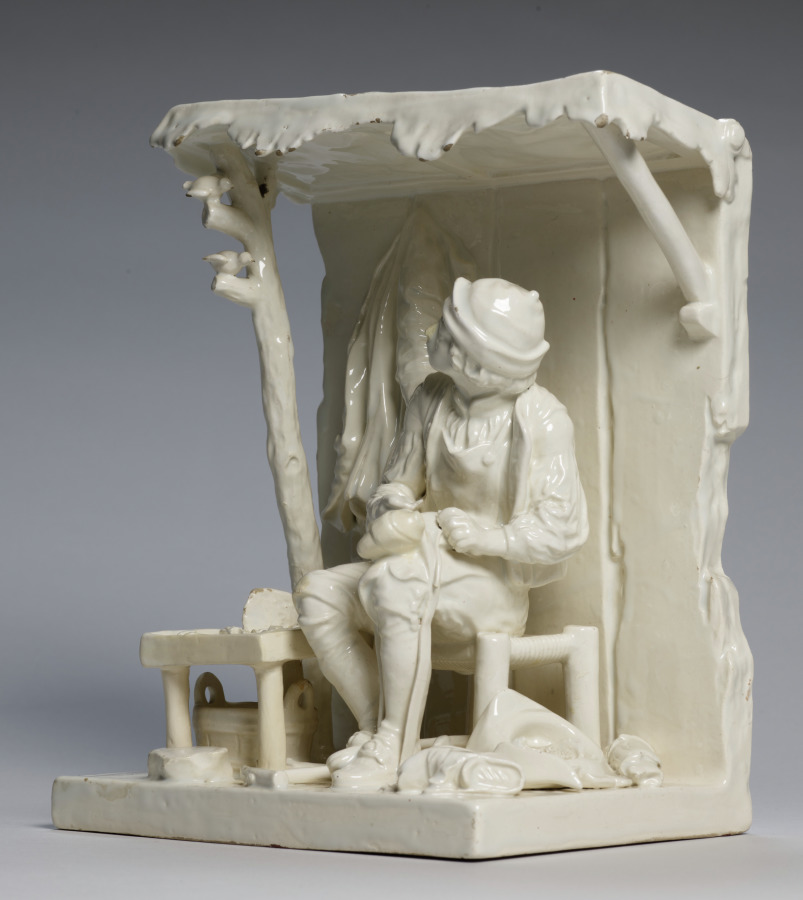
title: The Cobbler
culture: Italy or France, 19th century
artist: after a design by Paul-Louis Cyfflé (Flemish, 1724–1806)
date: 1800s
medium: earthenware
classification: Ceramic